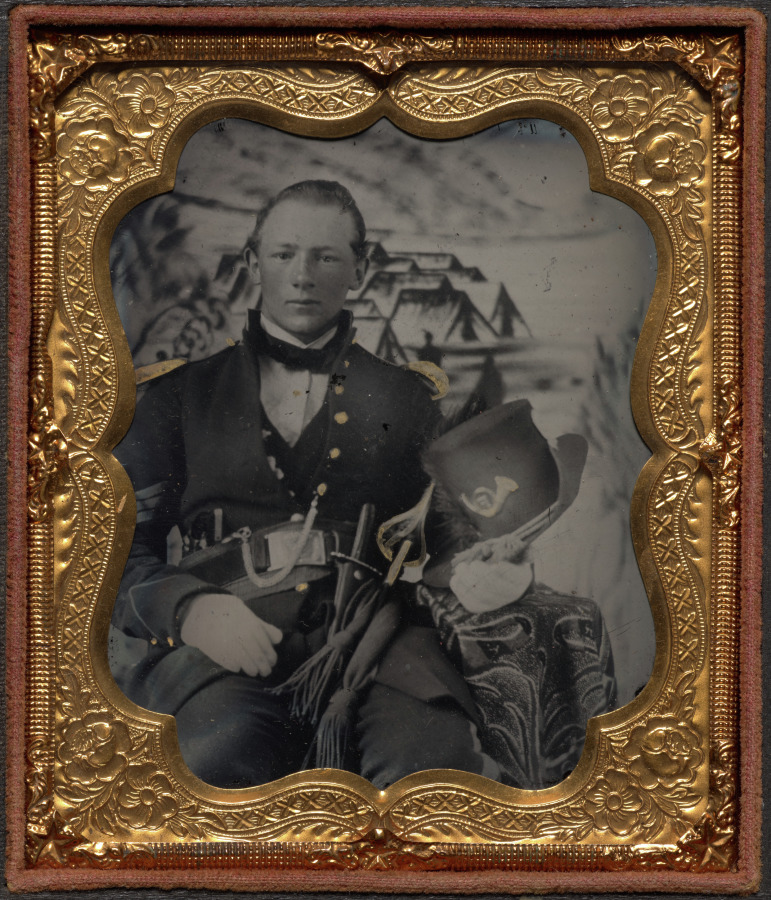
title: Civil War soldier with painted bivouac background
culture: America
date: c. 1861–65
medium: ambrotype, sixth plate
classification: Photograph